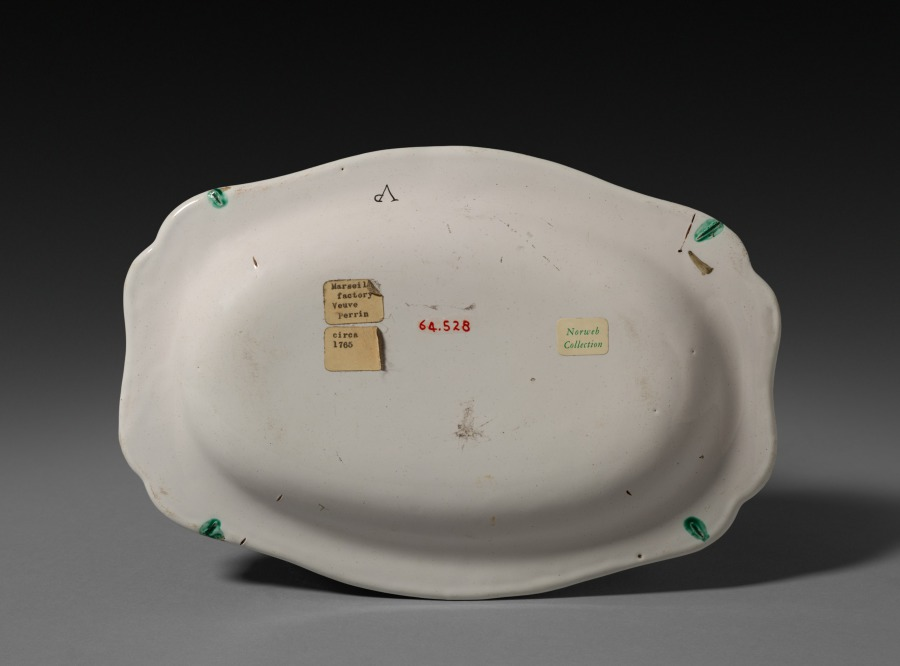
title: Platter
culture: France, Marseilles, 18th century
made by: Veuve Perrin Factory (French)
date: c. 1765–1775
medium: faience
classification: Ceramic